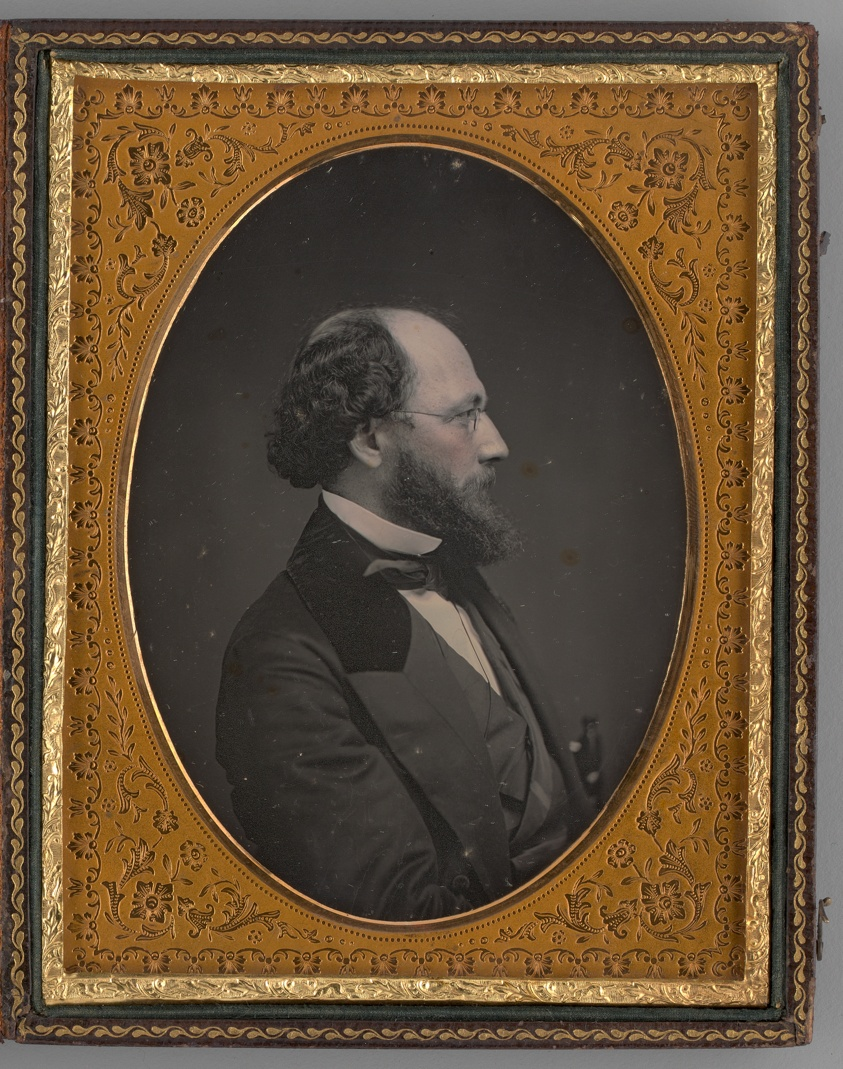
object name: Photograph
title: Untitled (Stephen Johnson Field)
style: 19th century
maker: George Howard Johnson; American, 1823-1879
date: 1854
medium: Daguerreotype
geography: United States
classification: portrait; photograph; photographic process; photography; portrait; daguerreotype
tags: lundberg collection, portrait, photography, men, Male, portraits, portraits: male subject